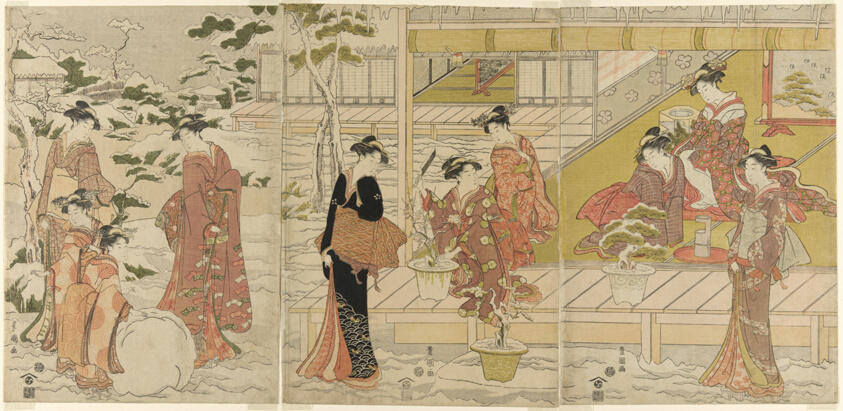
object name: Print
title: A Parody of Hachi no ki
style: Japanese (culture or style)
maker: Utagawa Toyokuni I 初代 歌川 豊国; Japanese, 1769–1825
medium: Color woodblock prints; oban triptych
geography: Japan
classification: woodblock print; print; asian art